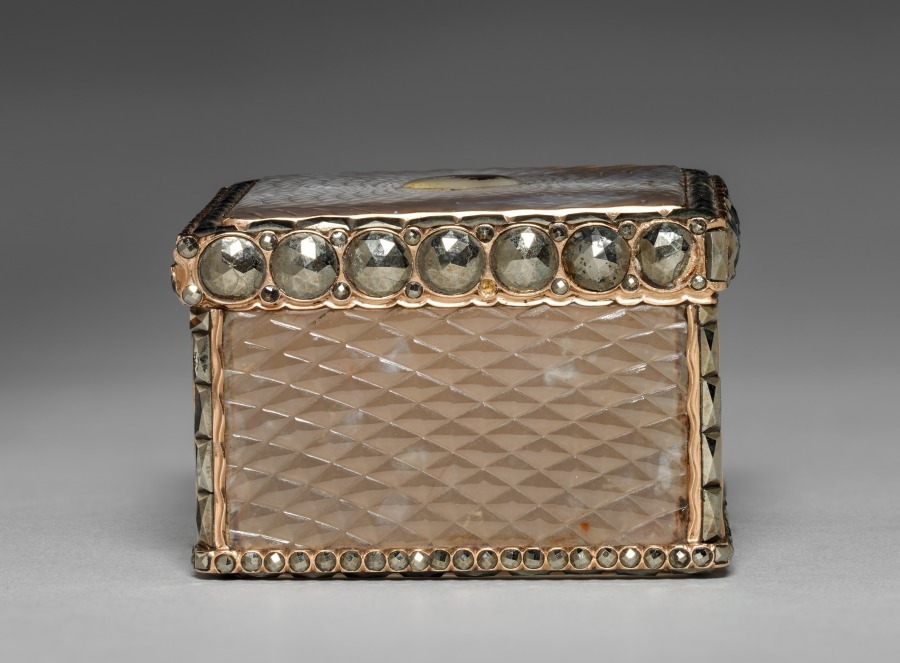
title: Snuff Box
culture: England, London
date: c. 1750–60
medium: gold-mounted agate, engine-turned panels, hematites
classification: Miscellaneous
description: Luxurious personal objects, like this snuff box, were an essential part of a privileged wardrobe during the 1700s and early 1800s, emphasizing their owner’s refinement and wealth. Their glittering surfaces, however, disguised a system based on the labor and suffering of enslaved or indentured people, whether in gold or gemstone mines, tobacco farms, or shops where these goods were made. Like cotton, sugar, and tea, snuff came from British colonies in America, India, and the Caribbean, where enslaved people were exploited to grow these crops under extremely harsh conditions.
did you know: This small, elaborate box held snuff, a form of powdered tobacco that was inhaled in tiny amounts.